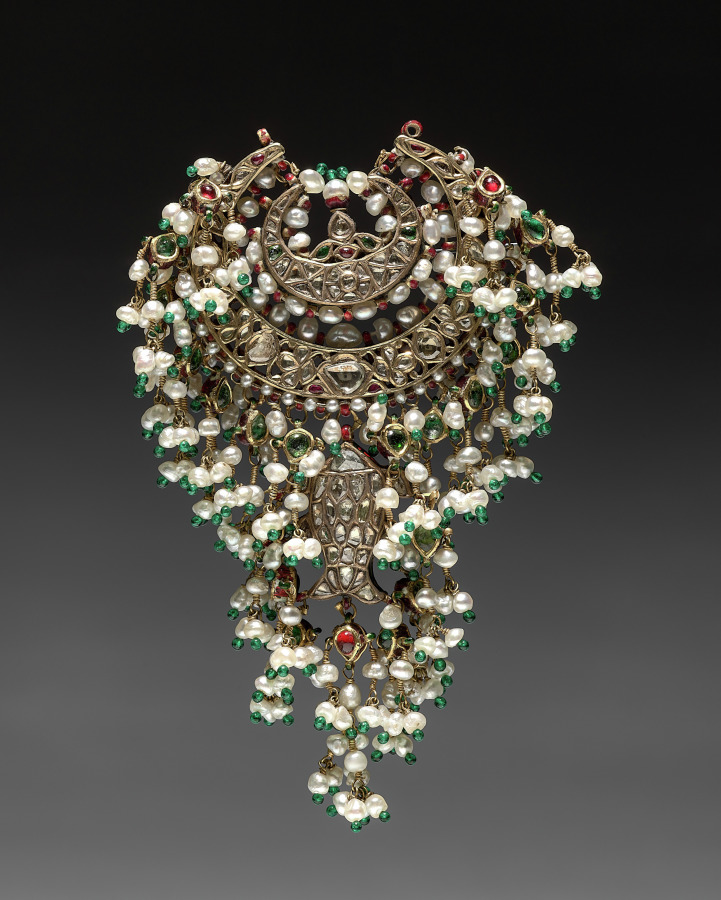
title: Pendant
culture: India, Delhi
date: 1800s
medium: Gilt silver with diamonds, emeralds, rubies, pearls, and enamel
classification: Jewelry